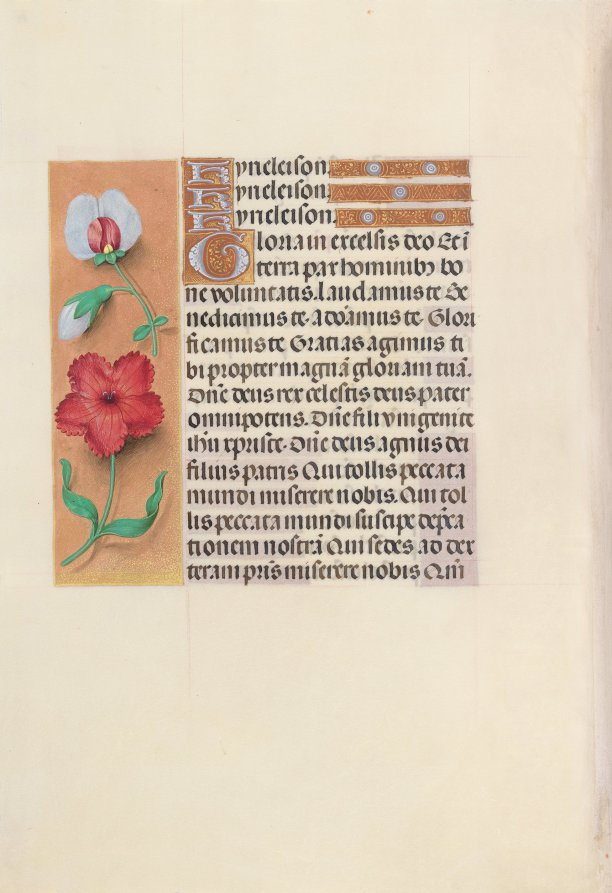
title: Hours of Queen Isabella the Catholic, Queen of Spain: Fol. 89v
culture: Flanders, Ghent and Bruges, late 15th century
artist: Master of the First Prayerbook of Maximillian (Flemish, c. 1444–1519)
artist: and Associates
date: c. 1500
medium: ink, tempera, and gold on vellum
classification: Bound Volume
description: This manuscript was illuminated by a circle of at least five highly organized manuscript painters active in the Flemish cities of Ghent and Bruges. The principal illuminator was Alexander Bening, who painted the majority of the book's miniatures. Manuscripts produced by this circle of artists are renowned for the decoration of their borders, which typically feature a rich variety of realistically-painted flowers, birds, and butterflies. This prayer book, called a book of hours, was intended not for a cleric, but for the private devotions of a lay person-in this case, Isabella the Catholic, Queen of Spain (1451-1504). Isabella's coat of arms embellishes the book's frontispiece. It is unlikely that the book was commissioned by the Queen herself; rather, she probably received it as a diplomatic gift from someone courting her patronage, perhaps Cardinal Francisco Jimenez de Cisneros. A Franciscan friar, Jimenez was dependent upon Isabella for his advancement, first to the post of Queen's confessor in 1492, and then to Archbishop of Toledo in 1495.